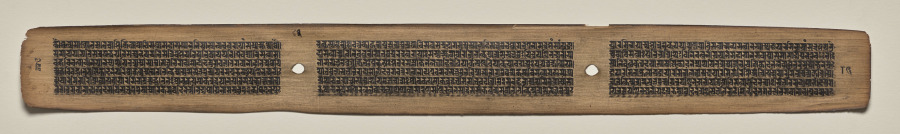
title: Text, Folio 83 (verso), from a Manuscript of the Perfection of Wisdom in Eight Thousand Lines (Ashtasahasrika Prajnaparamita-sutra)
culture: Eastern India, Bihar, Vikramashila Monastery. Painting: Nepal, Kathmandu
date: Sunday, September 14, 1119 (year 239 of the Newar Samvat in the month of Ashvina)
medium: gum tempera and ink on palm leaves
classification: Painting